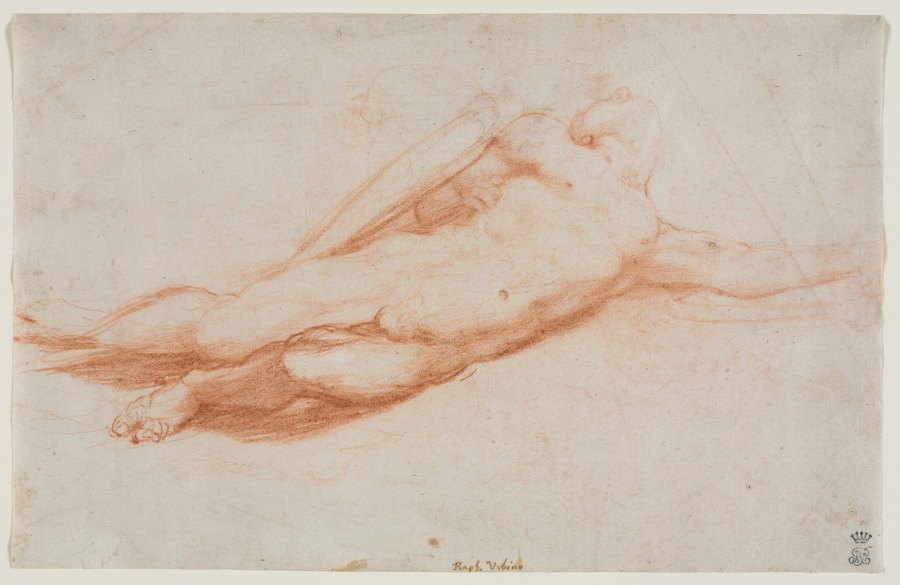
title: Study of a Fallen Soldier (possibly the Conversion of Saul) (recto); A Draped Female Figure (possibly an Amazon) and Architectural Studies (verso)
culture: Northern Italy, Emilia, first half 16th Century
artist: attributed to Correggio (Italian, 1489?-1534)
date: c. 1525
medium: red chalk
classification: Drawing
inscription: recto: in brown ink, lower center: Raph. Urbino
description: In this chalk study of a lone, fallen soldier, the brown ink inscription at the bottom of the sheet indicates that at one time it was believed to be by Raphael. However, it is now attributed to Correggio based on the sensuous drawing style that focuses attention on some details, like the soldier’s leg and foot, while other contours are barely sketched and shaded. The back, or verso, of the sheet presents quick sketches of classical-style architecture and a woman with a quiver of arrows on her back; she may be an Amazon, one of a race of warrior women skilled in archery, or Diana, goddess of the hunt.